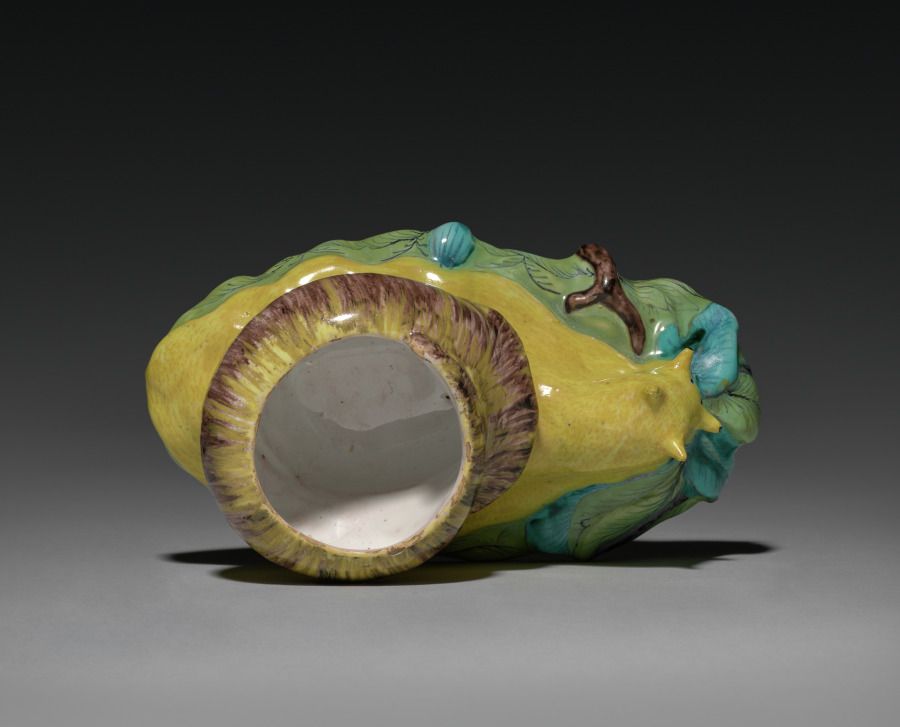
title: Box in the Form of a Snail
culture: France, 18th century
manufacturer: Strasbourg Factory (France)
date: c. 1750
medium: faience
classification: Ceramic